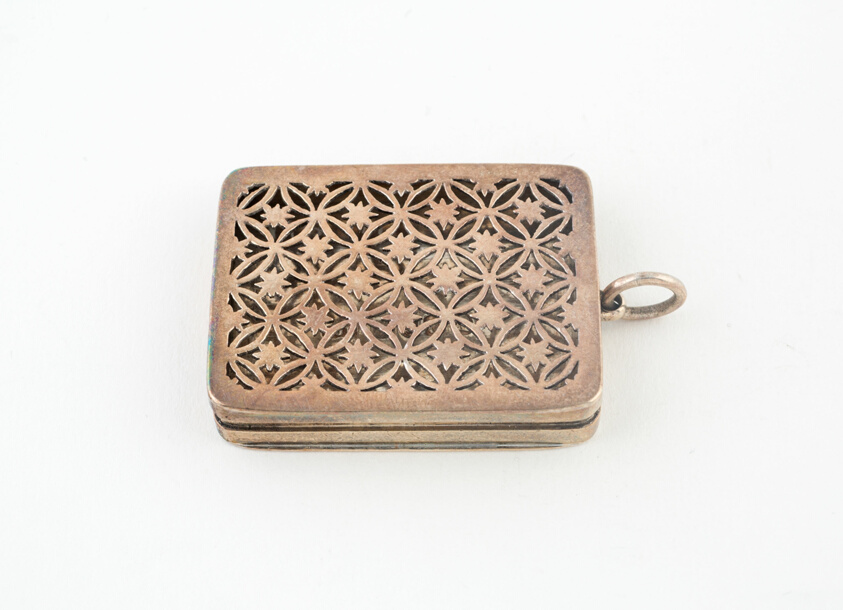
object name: Metalwork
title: Vinaigrette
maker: Marked CJB; London, England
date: c. 1815/16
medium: Silver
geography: London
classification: vinaigrette (container for health care); container for personal use; box; european decorative arts; metalwork; silver; decorative object/ornament